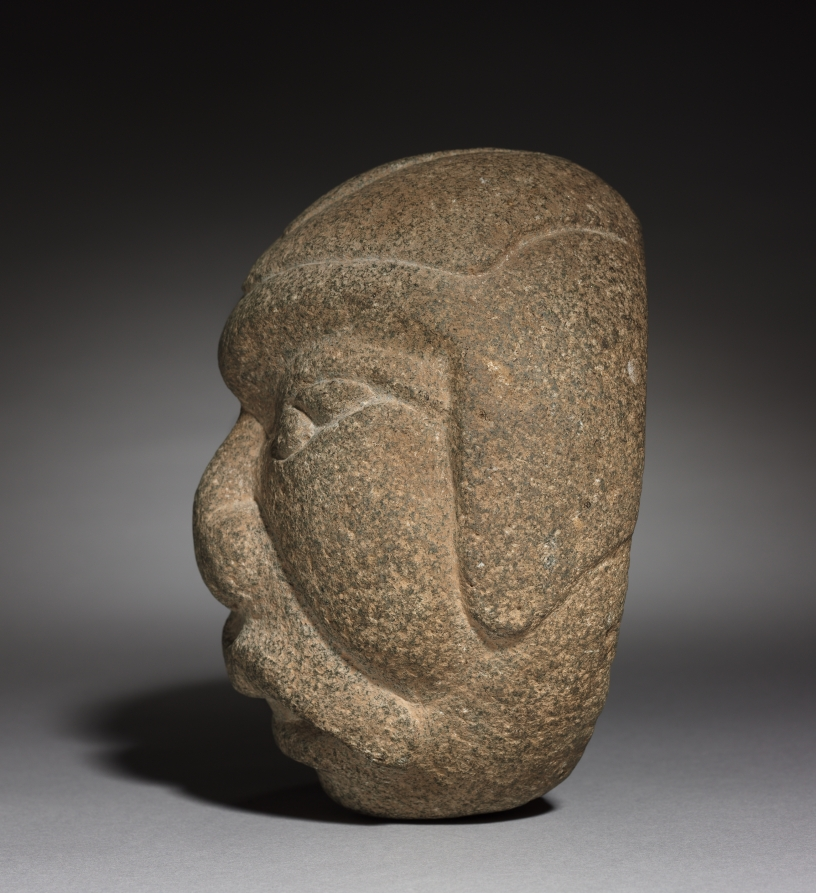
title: Head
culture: Mesoamerica, Mexico, Olmec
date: 1200–300 BCE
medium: stone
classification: Sculpture